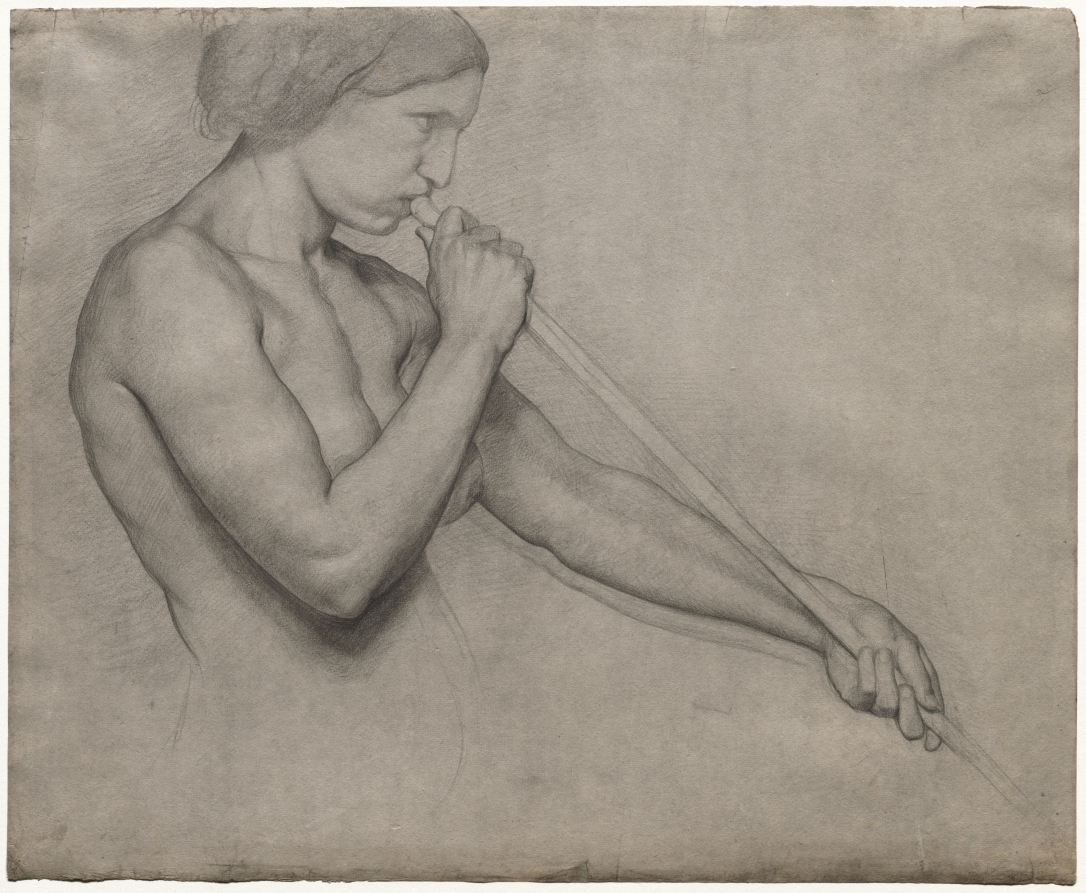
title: Angel Blowing a Trumpet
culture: France, 19th century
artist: Edgar Degas (French, 1834–1917)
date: 1857–59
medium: black chalk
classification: Drawing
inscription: verso, lower right, in graphite: 43 53 / 93 99 [underlined] / 65 75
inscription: lower right, in graphite: [illegible] ppl[illegible] [sumi?] [natural?] T A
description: The figure in this drawing closely resembles a number of trumpeting angels in drawings that Edgar Degas made between 1856 and 1858 in preparation for an ambitious but ultimately unrealized history painting on the subject of Saint John the Evangelist accompanied by an angel. Rather than referring to any single passage in the Book of Revelation, Degas distilled an image from passages describing seven trumpeting angels who unleash destruction on earth with their blasts, the voice of Christ that addresses John in loud tones "like a trumpet," and individual angels who lead and instruct the Evangelist.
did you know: Related studies suggest that the subject is a male model; Degas added breasts almost as an afterthought.